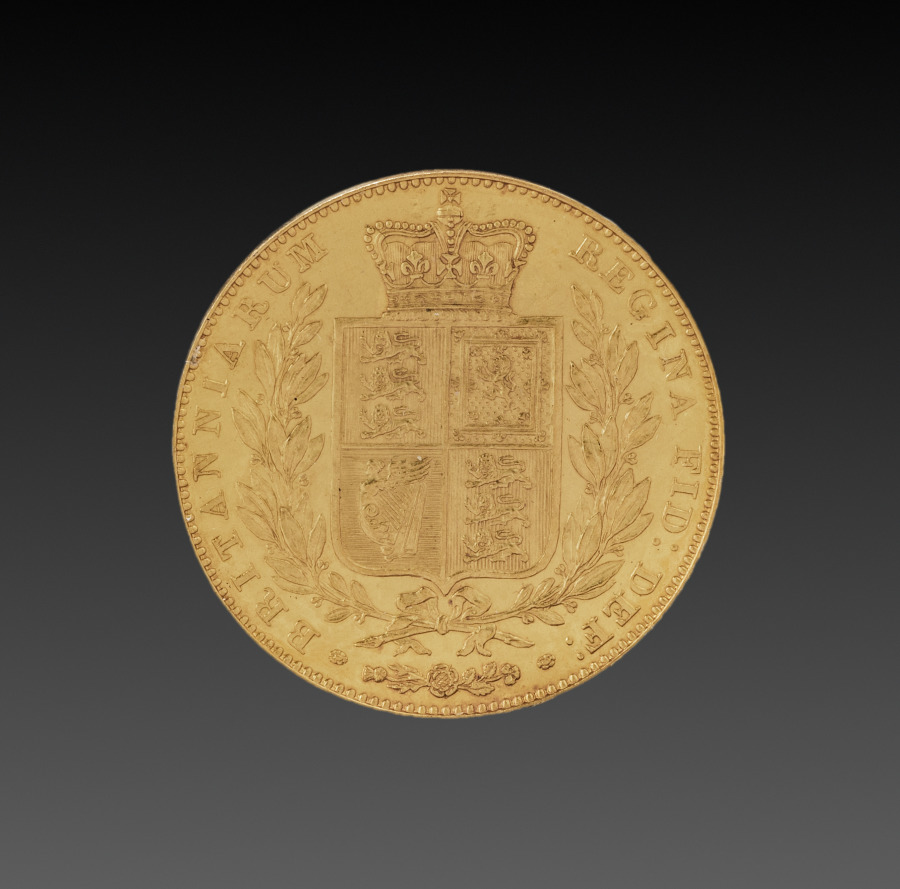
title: Sovereign: Broad Crowned Shield of Arms, Olive Branches and National Emblems (reverse)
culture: England, Victoria, 1837-1901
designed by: William Wyon (British, 1795–1851)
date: 1839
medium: gold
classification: Coins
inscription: REGINA FTD: DEF: BRITANNIARUM.